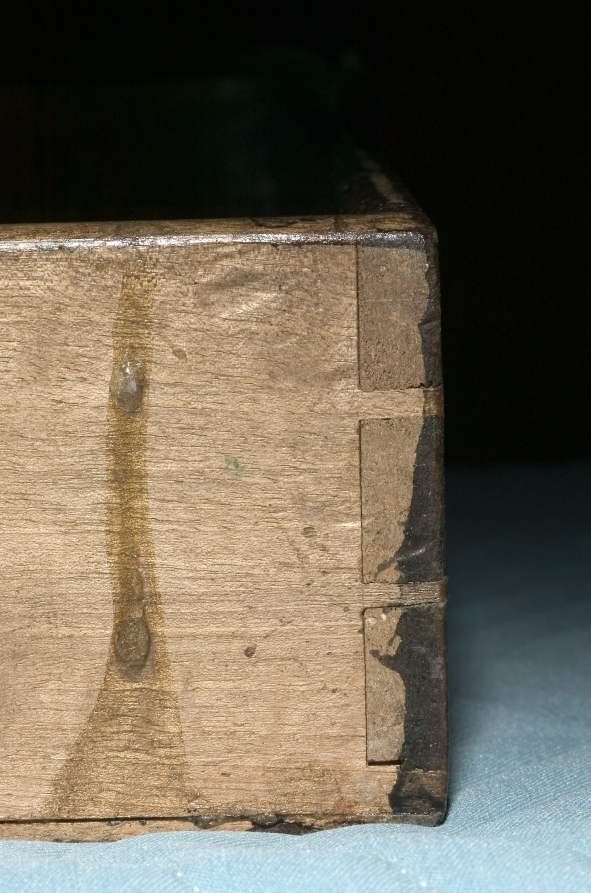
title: Table Desk (Bureau Plat)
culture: France, 18th century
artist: Bernard II van Riesen Burgh (Dutch, 1766)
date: c. 1750– 1760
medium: wood marquetry with gilt bronze mounts, leather top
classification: Furniture and woodwork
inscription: signed three times on bottom edge of apron: B. V. R. B.